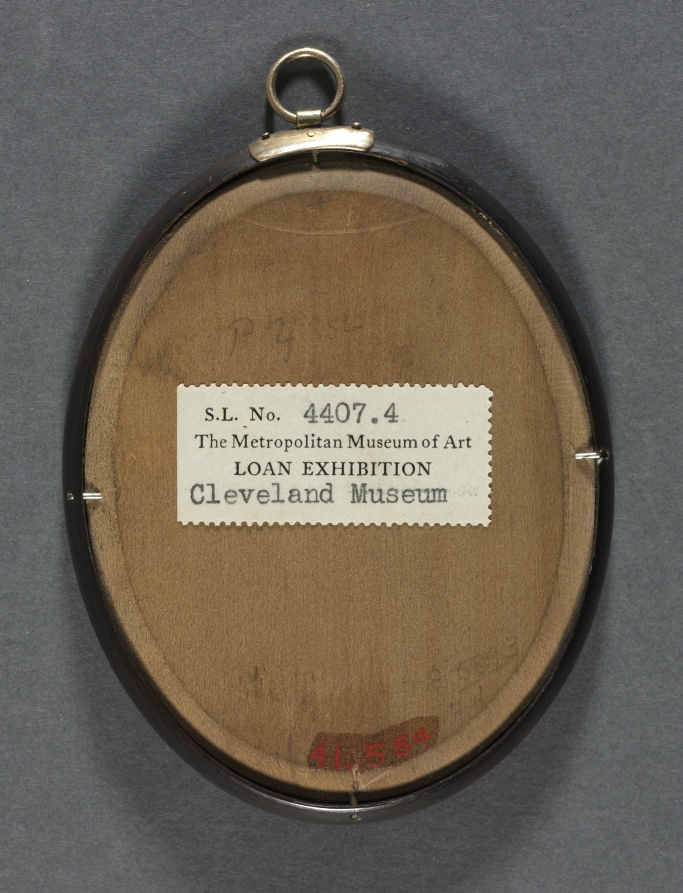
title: Portrait of a Woman in Blue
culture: England, early 18th Century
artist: Peter Cross (British, c. 1645–1724)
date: c. 1700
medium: watercolor on vellum in original ivory frame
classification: Portrait Miniature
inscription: signed right: PC [monogram]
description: Living in London, the youngest of seven children, Peter Cross was probably apprenticed to a limner following the death of his wealthy father. His first miniatures date from around 1661, and he remained active until his death, ushering the medium into the eighteenth century; the greatest British miniaturists working during his lifetime, all had died or ceased to work by 1700. Although ivory had been adopted as a support for British miniature painting a decade before his death, Cross exclusively used the older medium of vellum adhered to card. The artist was also an avid collector, assembling an impressive group of miniatures that included at least twelve works by his neighbor Samuel Cooper. This collection was sold in 1722 at Cross’s house in Covent Garden. Cross’s style is distinguished by a fi ne stippling of colors that combine to create soft, voluminous hair and pale flesh tones. His later works tend to leave the prepared white ground of the vellum bare—coincidentally, a strategy that was adopted by artists painting miniatures on ivory to exploit the support’s translucence. The details of his early instruction are still obscure, but some scholars have postulated that Cooper trained Cross, whereas others note a greater resemblance to the style of Hoskins, and still others detect a similarity to French stippling and suggest that he may have been trained overseas. The artist depicted the unknown sitter almost full face before a plain gray background with her head turned slightly to the right. She dons a white gown trimmed with ruffles at the neckline and a bright blue mantle over her right shoulder. Her powdered hair is swept up and loosely covered either by the blue mantle or a scarf of the same color.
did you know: This miniature is in its original ivory frame, stained a mottled brown to imitate tortoise shell.